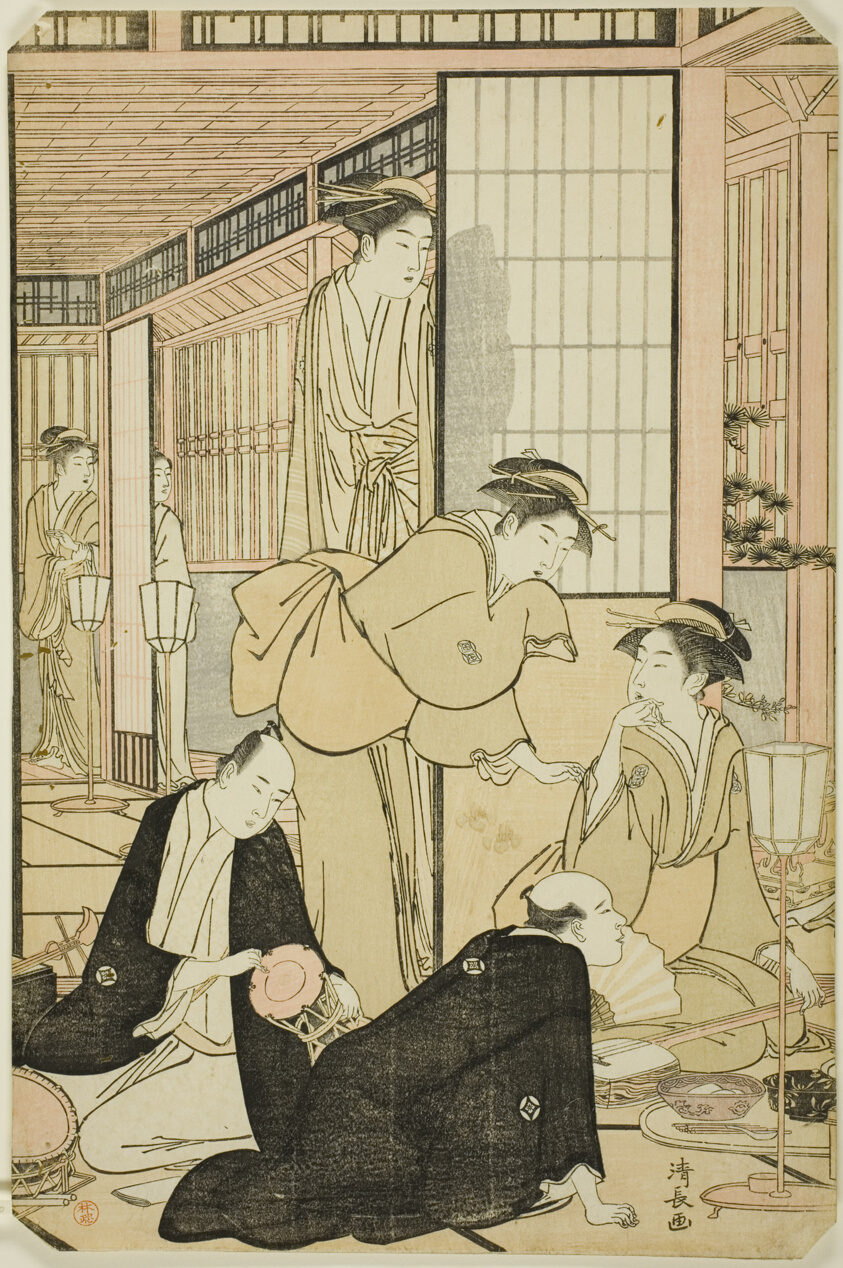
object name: Print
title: The Eighth Month, from the series "Twelve Months in the South (Minami juni ko)"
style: Japanese (culture or style)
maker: Torii Kiyonaga (Japanese, 1752-1815)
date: c. 1784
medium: Color woodblock print; left sheet of oban diptych, trimmed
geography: Japan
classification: print; asian art